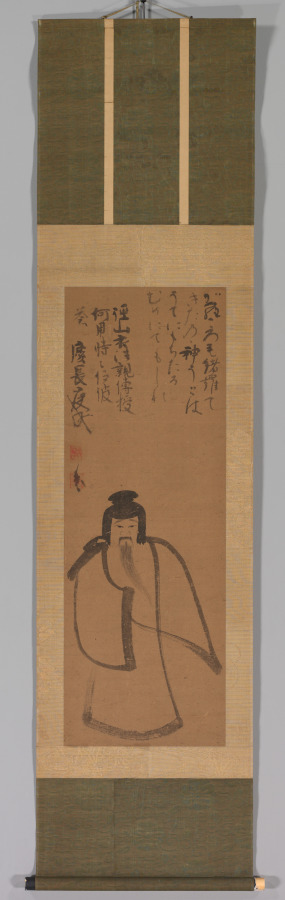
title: Tenjin Traveling to China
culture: Japan, Momoyama period (1573–1615)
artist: Konoe Nobutada (Japanese, 1565–1614)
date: 1610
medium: hanging scroll; ink on paper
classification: Painting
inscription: signed: Nobutada's cipher signature kao inscribed: two poems above, dated Keicho 15